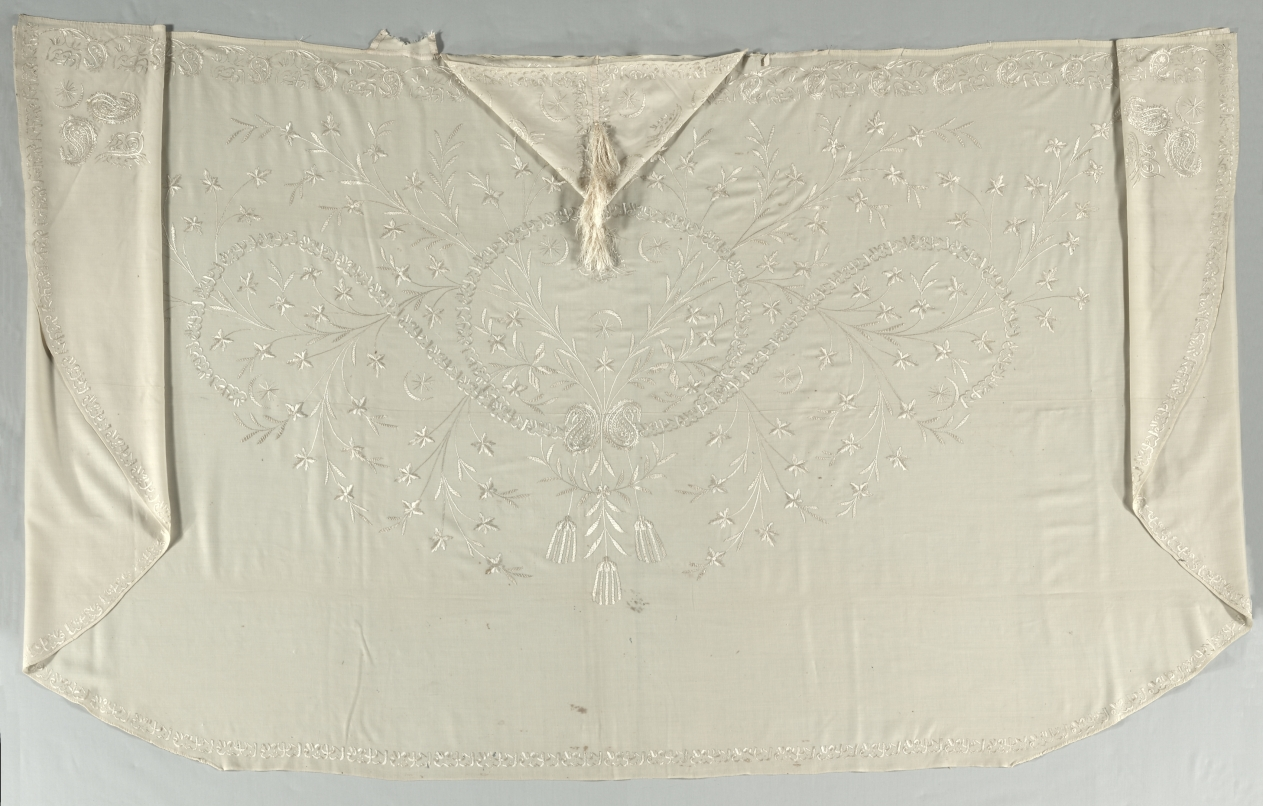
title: Embroidered Robe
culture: Turkey, 19th century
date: 19th century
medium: embroidery; silk on wool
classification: Garment